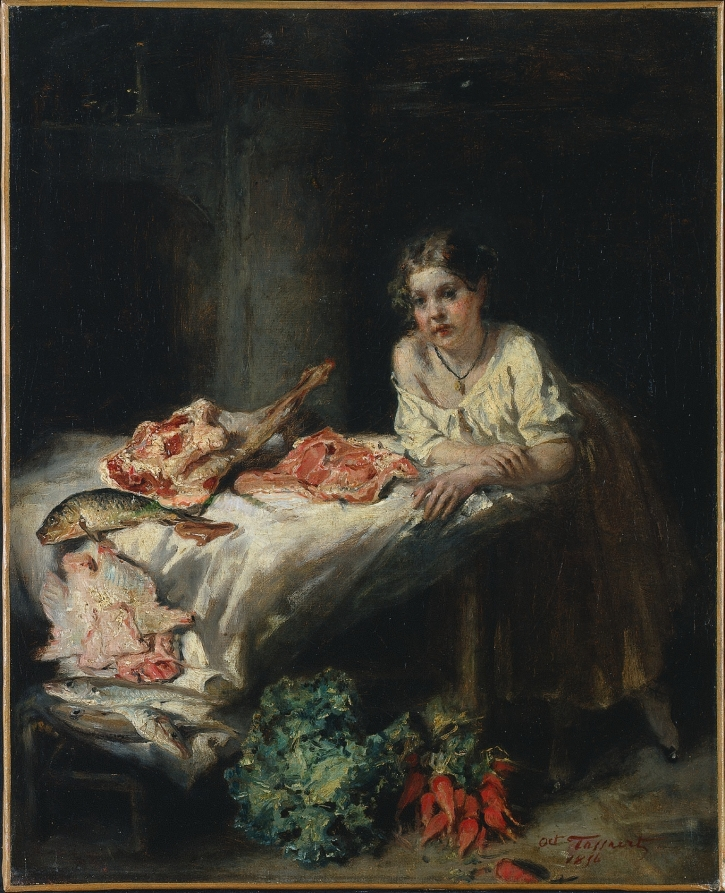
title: The Bourgeois' Kitchen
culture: France, 19th century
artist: Octave Tassaert (French, 1800–1874)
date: 1854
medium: oil on fabric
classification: Painting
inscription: Signed lower right: Oct Tassaert / 1854